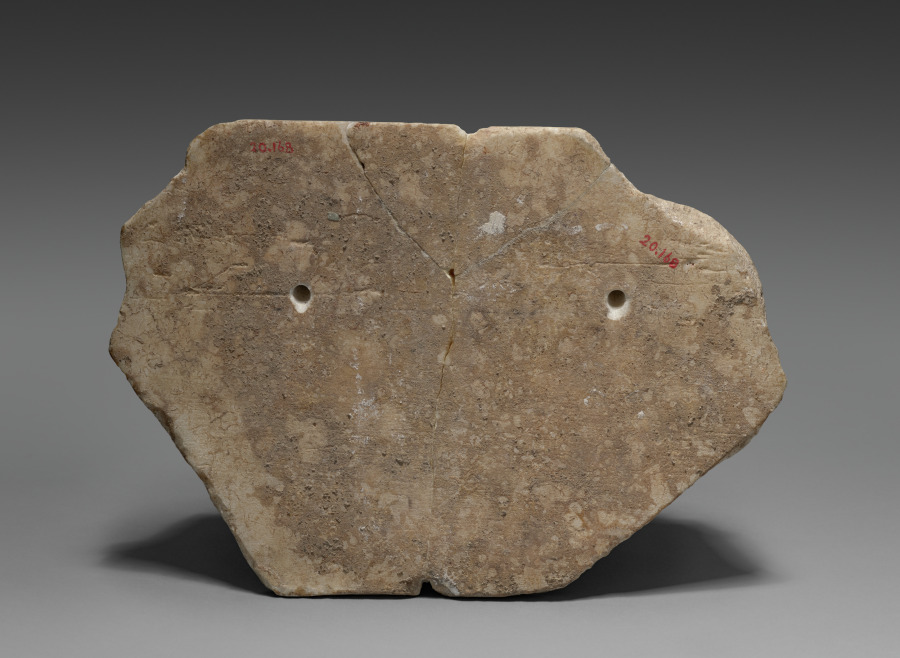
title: Two Masks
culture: Italy, Roman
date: 200s CE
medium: marble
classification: Sculpture